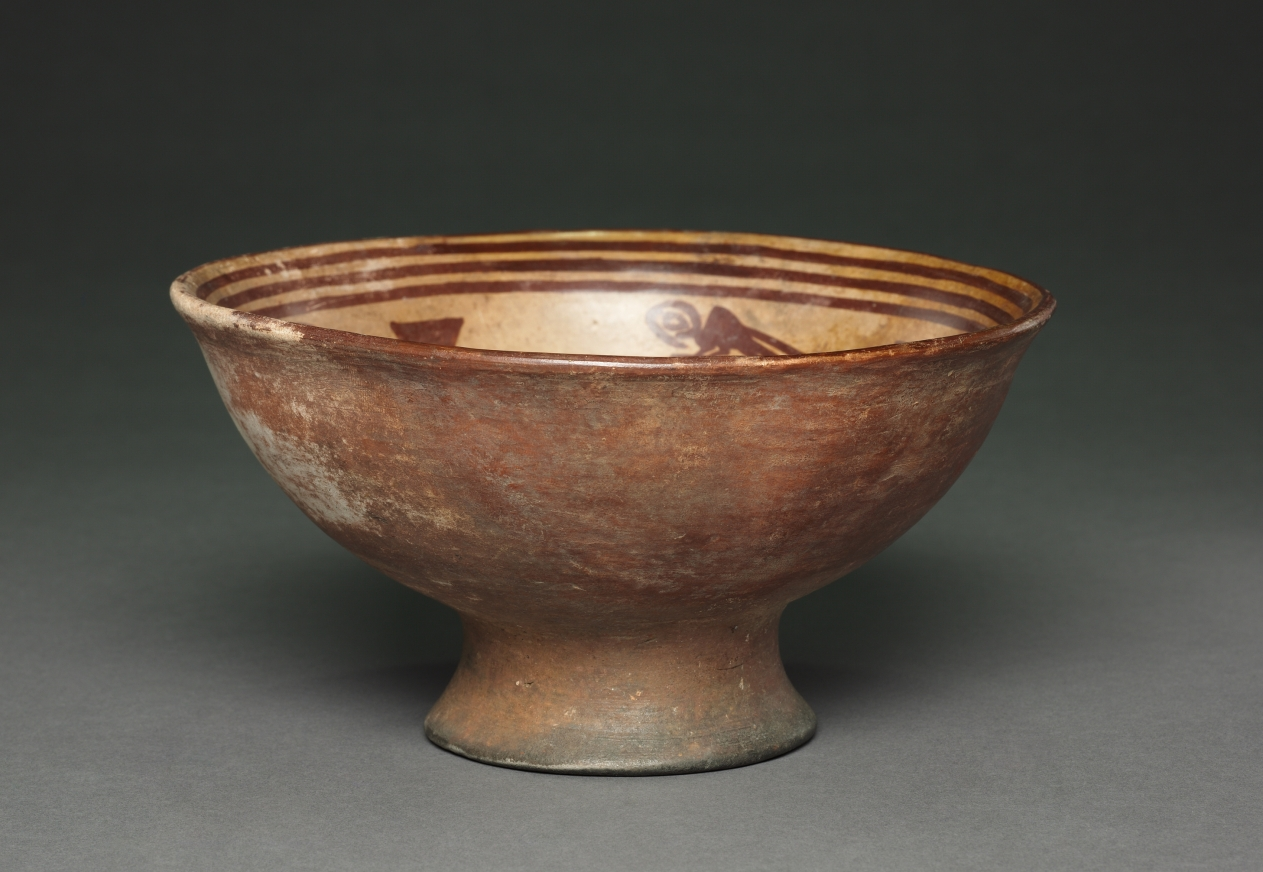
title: Bowl with Procession and Houses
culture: Colombia, Highland Nariño region,Tuza style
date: 1250–1550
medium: ceramic, slip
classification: Ceramic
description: In the Nariño region of southwestern Colombia, the dead were buried in shaft tombs, the most elaborate up to sixty feet deep and furnished with offerings such as these bowls. Colombian ceramics are not much studied and little can be said about their imagery, which reveals a keen interest in geometric abstraction. Depicted here are a row of figures with thatch-roofed huts, humans attacked by birds, and spiders.